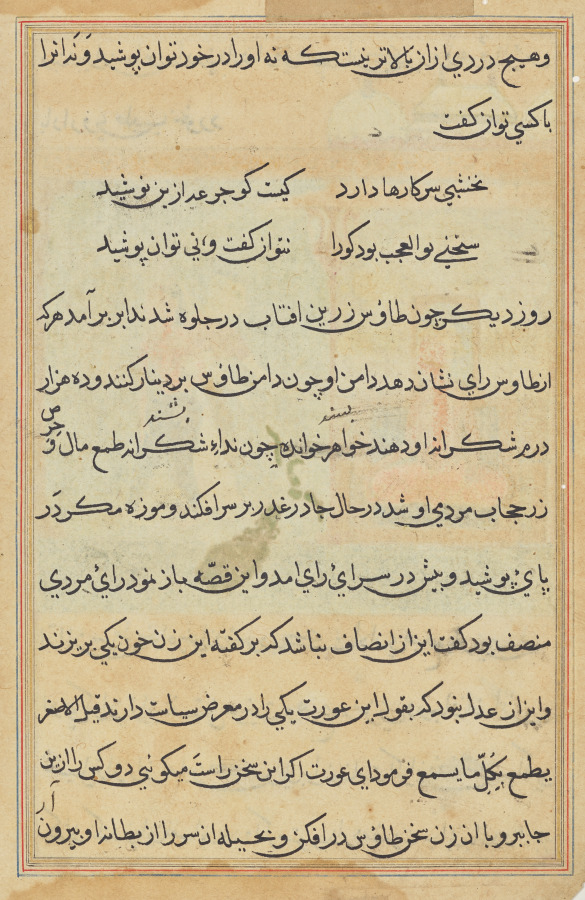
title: Page from Tales of a Parrot (Tuti-nama): text page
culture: Mughal India, court of Akbar (reigned 1556–1605)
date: c. 1560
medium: gum tempera, ink, and gold on paper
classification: Painting